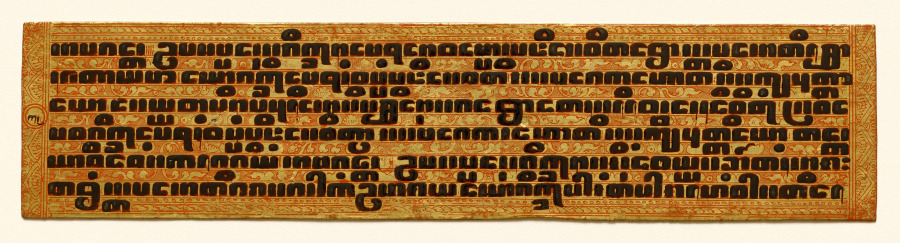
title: Text, folio 6 (verso) from a Kammavacha: Buddhist ordination text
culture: Myanmar (Burma)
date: 1800s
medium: Leaf: lacquer and gilding on cloth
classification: Manuscript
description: In premodern Burma, lay people commissioned lavishly ornamented manuscripts for ceremonial occasions, when officiants would read aloud from the text. Written in black lacquer, the text is in the language of Pali written in a Burmese script. It contains ordination rites and procedures for monastic ceremonies. The second to last page is covered with intricately drawn, winged celestial beings (nats) in gestures of praise. They fly amid intertwining vegetation—denoting bounty—that grows from serpentine forms that refer to rain clouds. Lionlike forms inhabit the space with them. The top and bottom covers are equally ornamented with jeweled floral patterning.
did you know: The Pali text of this manuscript is written in Burmese square script, which is also known as "tamarind seed script."